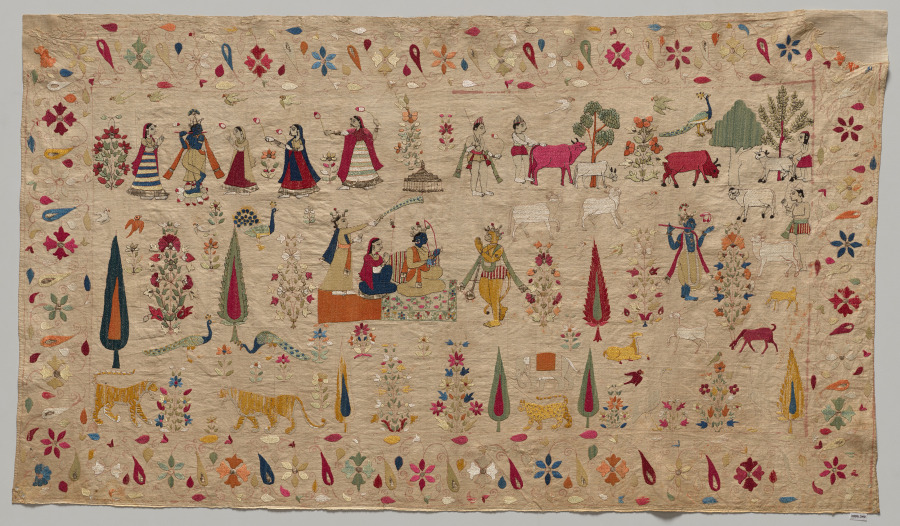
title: Rumal with Rama and Krishna scenes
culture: Northern India, Pahari Kingdom of Chamba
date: 1700s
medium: Silk and silver wire on cotton; embroidery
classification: Embroidery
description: Rumal refers to a double-sided embroidery technique perfected by women in the Pahari region of the northwest Himalayas. Unlike other forms of embroidery, no knots or loose strings are visible. Rumals were intended to look like paintings on cloth. An artist who was skilled in making Pahari paintings drew outlines of the composition with a brush on hand-loomed cotton muslin fabric and noted the colors to be used. Women then used a type of stitch called “double satin stitch” to create flat planes of color on both sides of the fabric. Girls were responsible for winding the silk threads into multistrand embroidery floss. Rumals were treasured as objects of wealth and given as gifts during weddings or state ceremonies. Many rumals depict subjects drawn from Hindu devotional literature. In the center, the semidivine monkey general Hanuman pays his respects to his lord Rama, Rama’s wife Sita, and Rama’s brother Lakshmana. Surrounding them above and to the right are bucolic rural scenes from the life of Krishna, another human incarnation of the god Vishnu. Krishna with his flute serenades the gopis (women of the cow herding community) and entertains his friends the cowherd boys (gopas). Flowering plants, vines, and wild animals populate the remaining space and borders. With such scenes, the painstaking act of double-sided embroidery becomes a devotional endeavor that generates religious merit.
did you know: Especially in the borders, some of the embroidery has fallen away, revealing the brushwork of the designer.